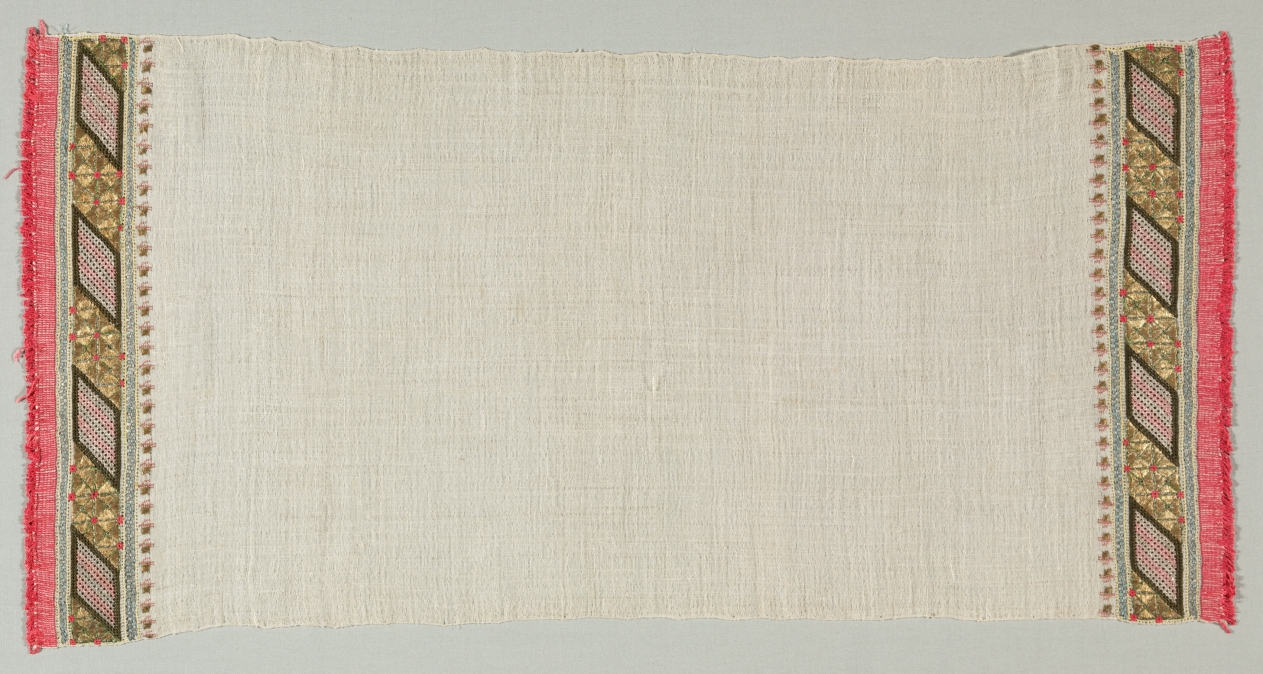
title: Embroidered Towel (Peshkir)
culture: Turkey, 19th century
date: 19th century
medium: embroidery; silk and silver filé on linen ground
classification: Embroidery